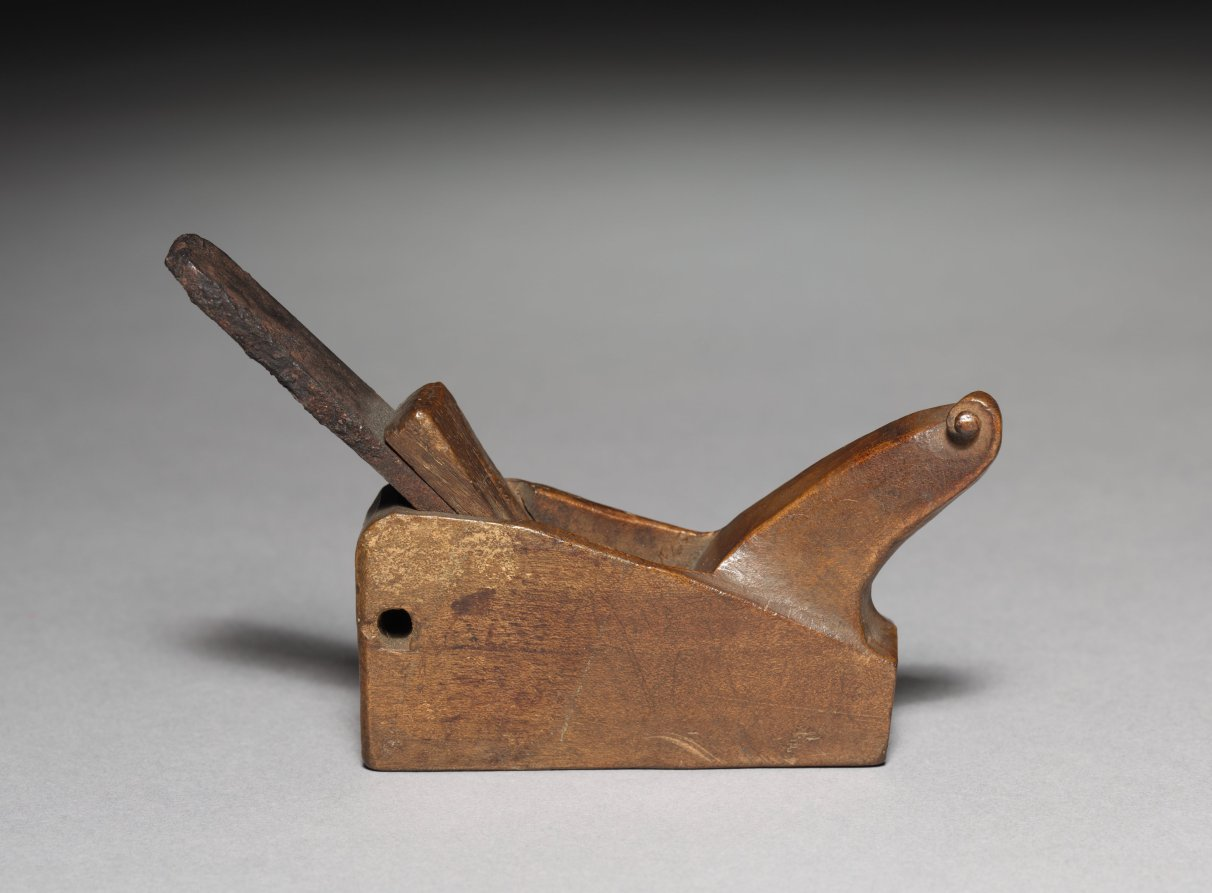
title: Plane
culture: Europe, 18th century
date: 1700s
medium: wood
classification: Tool